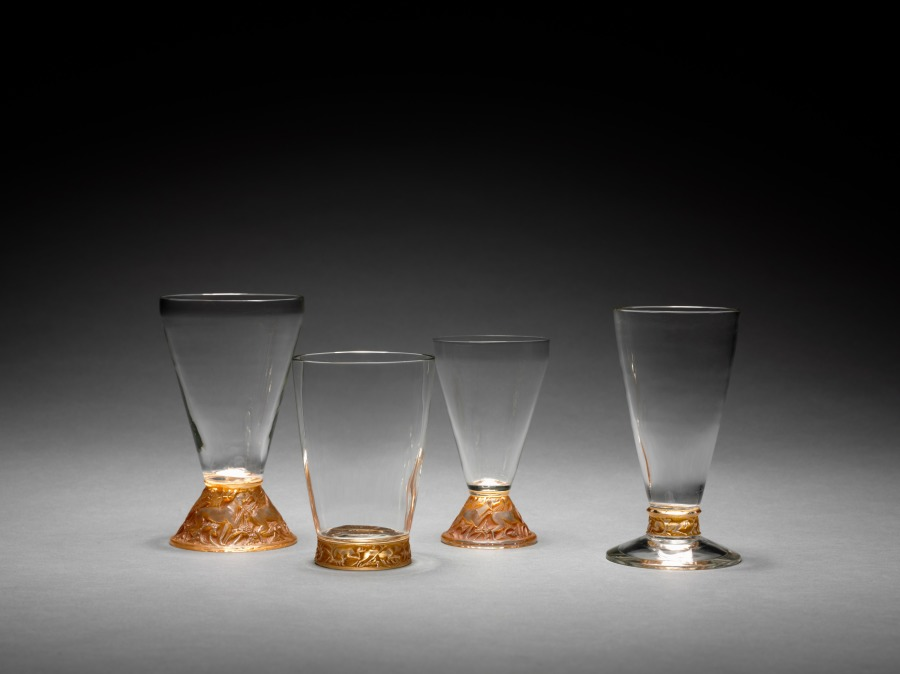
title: Ring of Dogs Footed Water Glass (Verre à pied bague chiens)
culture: France, 20th century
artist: René Lalique (French, 1860–1945)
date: c. 1913–21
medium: glass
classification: Glass